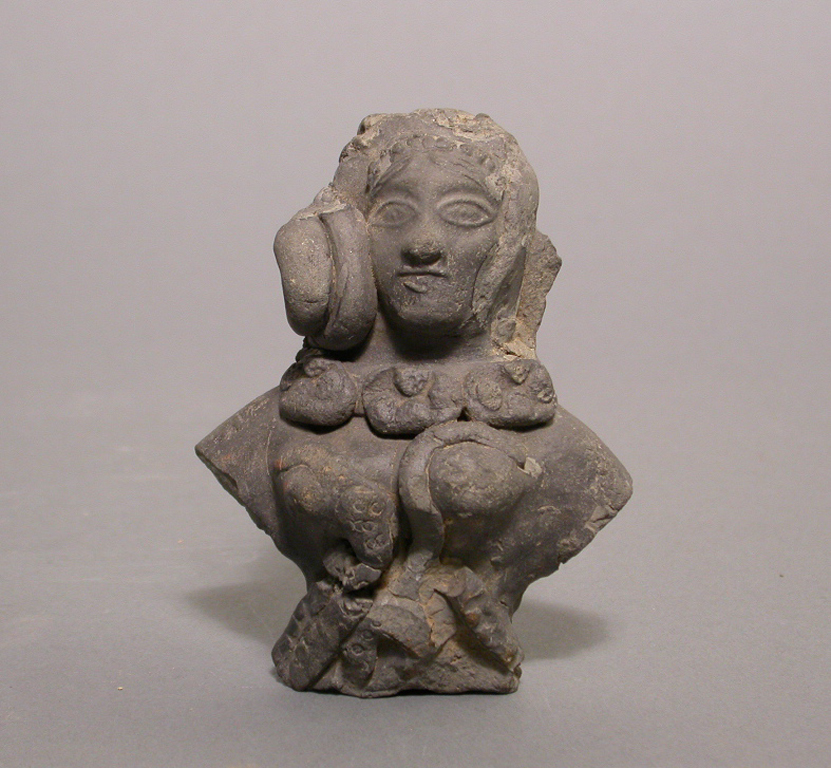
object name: Sculpture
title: Torso of a Female Figurine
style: South Asian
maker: India; Uttar Pradesh, Mathura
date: Mauryan period, 3rd/2nd century B.C.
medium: Hand-modeled gray terracotta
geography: Mathura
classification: earthenware; ceramics; sculpture; asian art